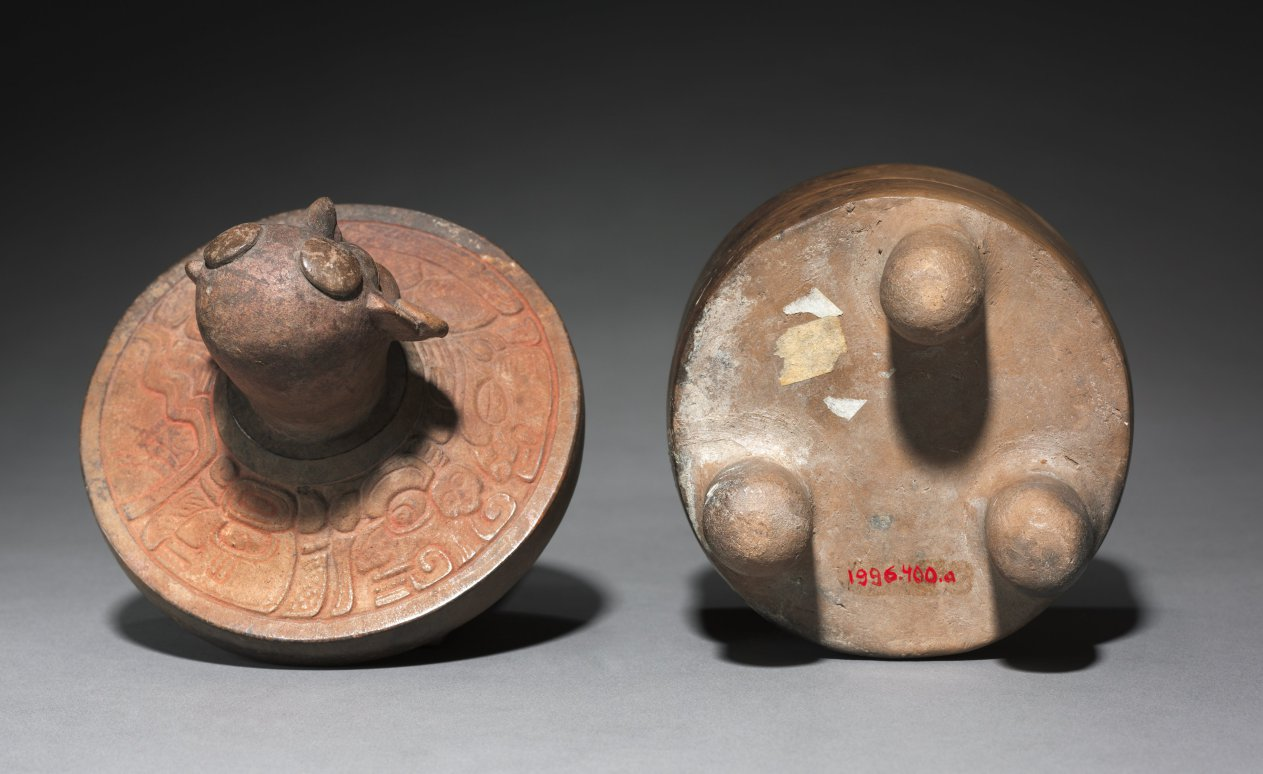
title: Tripod Vessel with Lid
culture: Mexico or Central America, Maya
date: 250–600 CE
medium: earthenware with pigment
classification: Ceramic